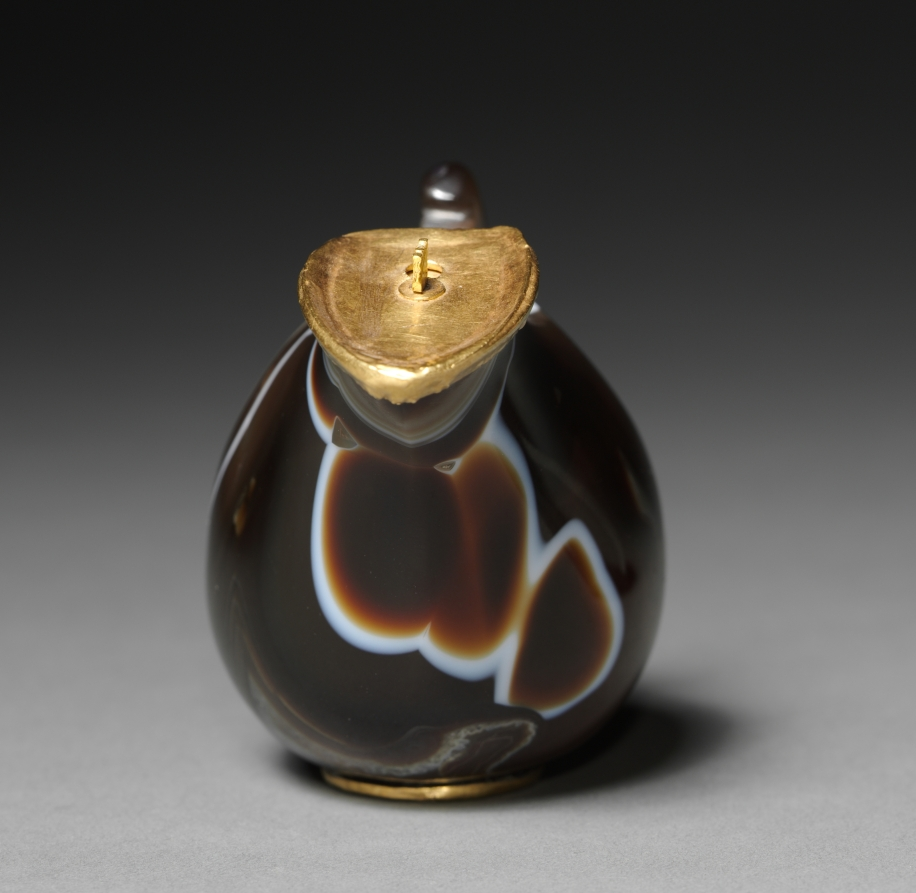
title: Askos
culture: Greece, Ptolemaic Dynasty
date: 200–1 BCE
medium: agate and gold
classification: Cosmetic Objects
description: This miniature vessel was carved from a single piece of banded agate, polished to a shine, and embellished with a gold lid and gold details on the base. Inside the ring of gold at the base is a trio of gold papyrus stalks, a likely reference to Egypt. In shape, it resembles an ancient wineskin, or askos, though its small size suggests use for luxury perfumes or oils. A tiny crab, likely once inlaid with a precious material, has been carved behind the handle.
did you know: The knob on the lid connects to a hidden disk to control the flow of liquid.